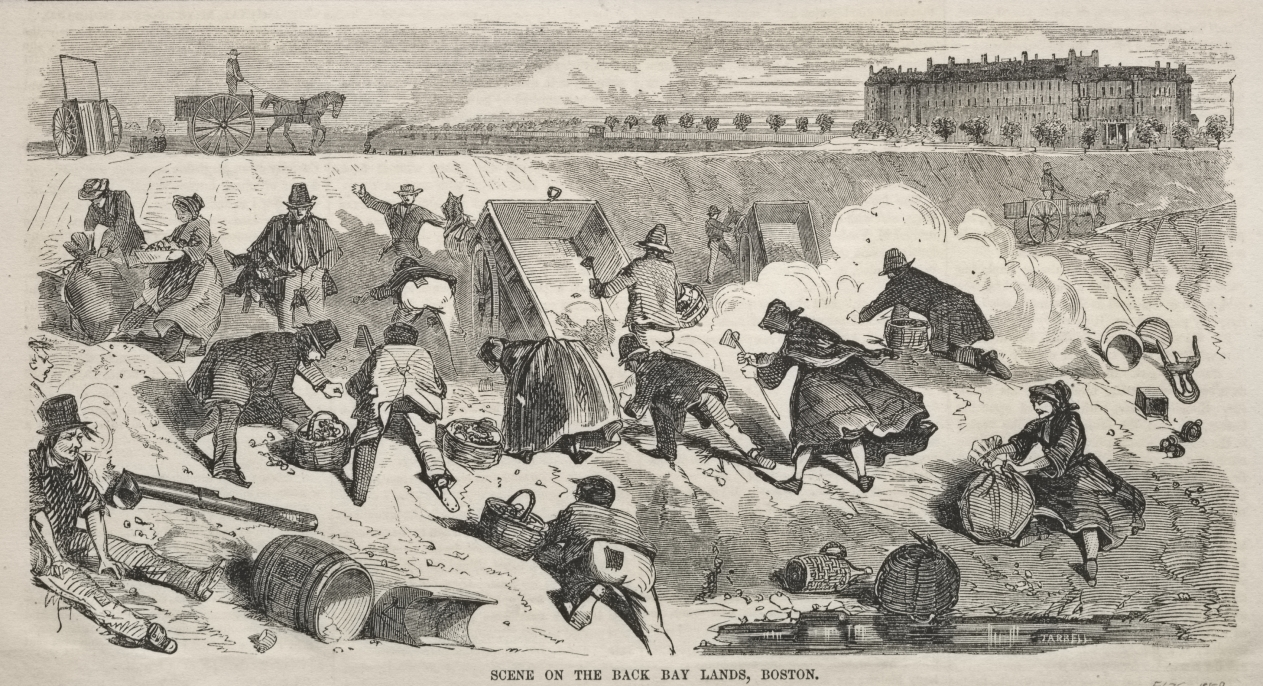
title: Scene on the Back Bay Lands, Boston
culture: America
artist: Winslow Homer (American, 1836–1910)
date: 1859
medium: wood engraving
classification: Print